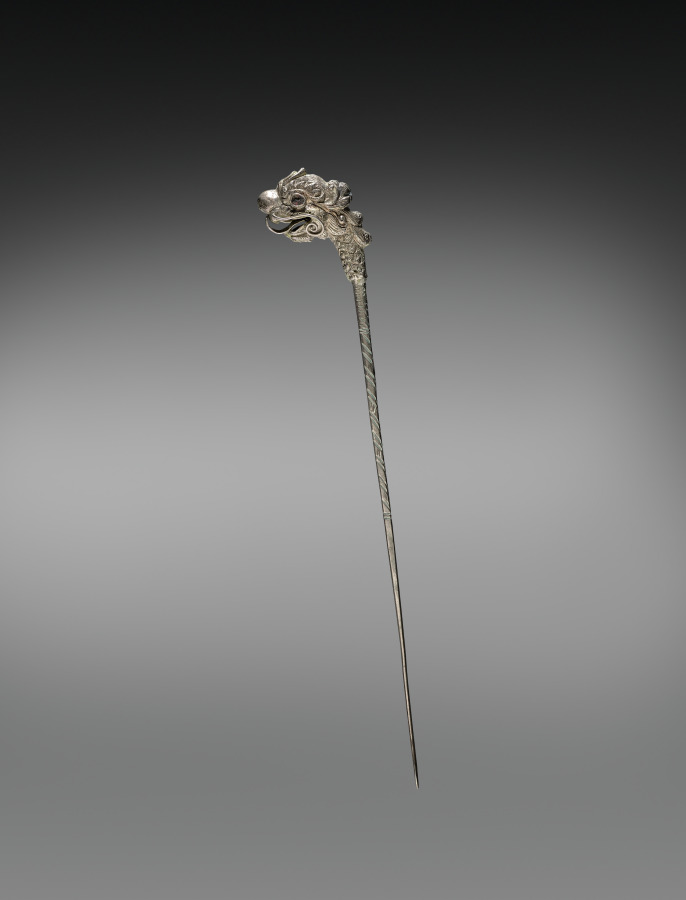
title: Hair Pin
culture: Siam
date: 1800s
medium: silver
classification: Jewelry